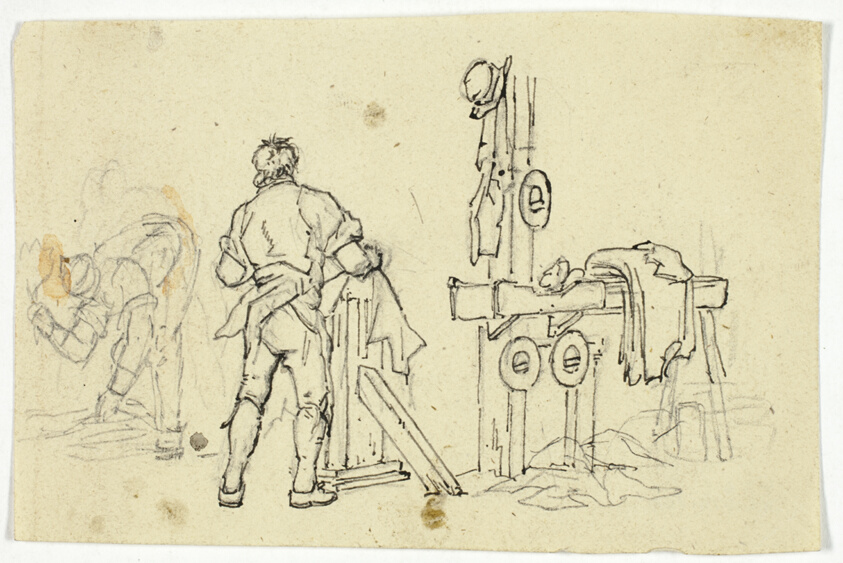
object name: Drawing and Watercolor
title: Two Laborers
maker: William Henry Pyne (English, 1769-1843)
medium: Pen and black ink and graphite on cream wove paper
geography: England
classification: pen and ink drawings; drawings (visual works); prints and drawing